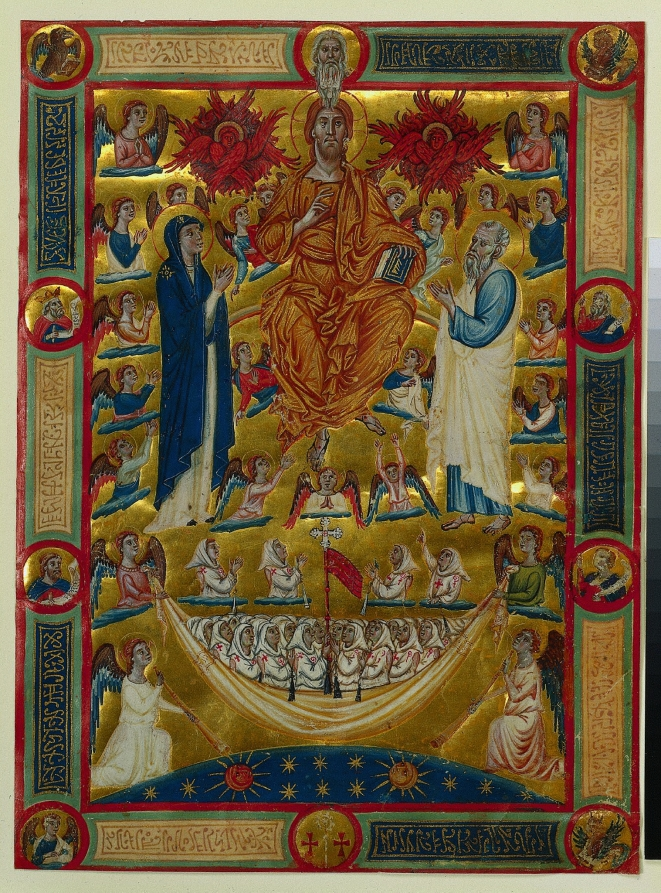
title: Christ in Majesty with the Virgin and Saint John the Evangelist: Single Leaf from a Book of Rules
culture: Italy, Venice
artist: circle of Master of the Washington Coronation (Italian, active c. 1300–30)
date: c. 1310–20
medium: ink, tempera, and gold on parchment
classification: Manuscript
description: In this complex image, the Virgin and St. John stand next to Christ at the Last Judgment as the final trumpets blow. Assembled below are members of the Confraternity of St. John the Evangelist in Venice, robed in white with the insignia of their order: a pastoral staff and crosses. This beautiful page comes from a mariegola, or the book of rules of this confraternity. During the late Middle Ages, every town had one or more confraternities, organizations of lay people who undertook to carry out the ideals of the Franciscans and Dominicans. Confraternities were created for the special veneration of a saint or the Holy Sacrament (the body and blood of Christ). One of their tasks was to strengthen the faith of their members.